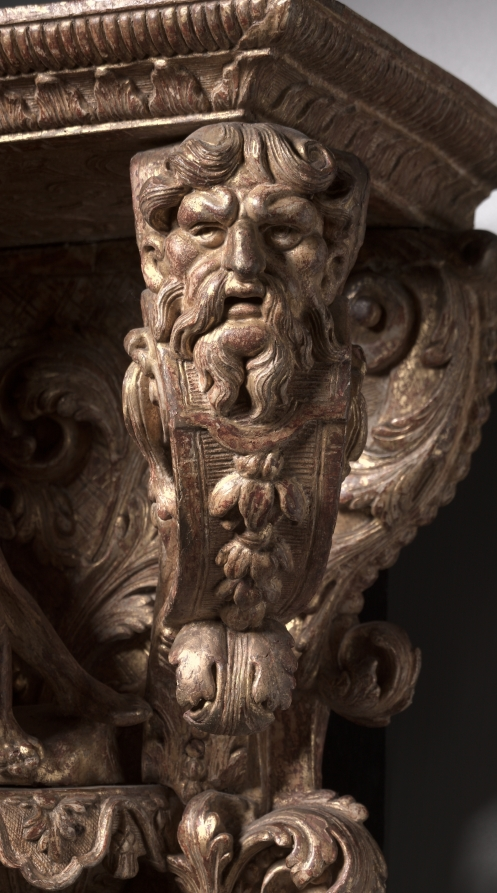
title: Wall Bracket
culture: France, 17th century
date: c. 1650–75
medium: carved and gilt wood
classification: Furniture and woodwork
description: The carved decoration depicts Hercules and the Nemean lion.